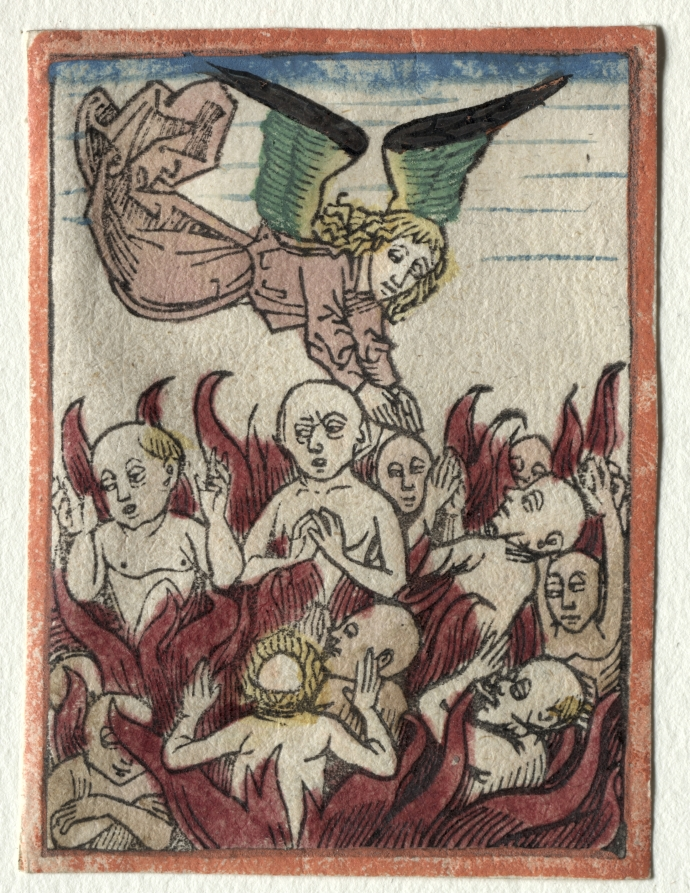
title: Purgatory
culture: Germany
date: 1400s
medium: woodcut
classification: Print